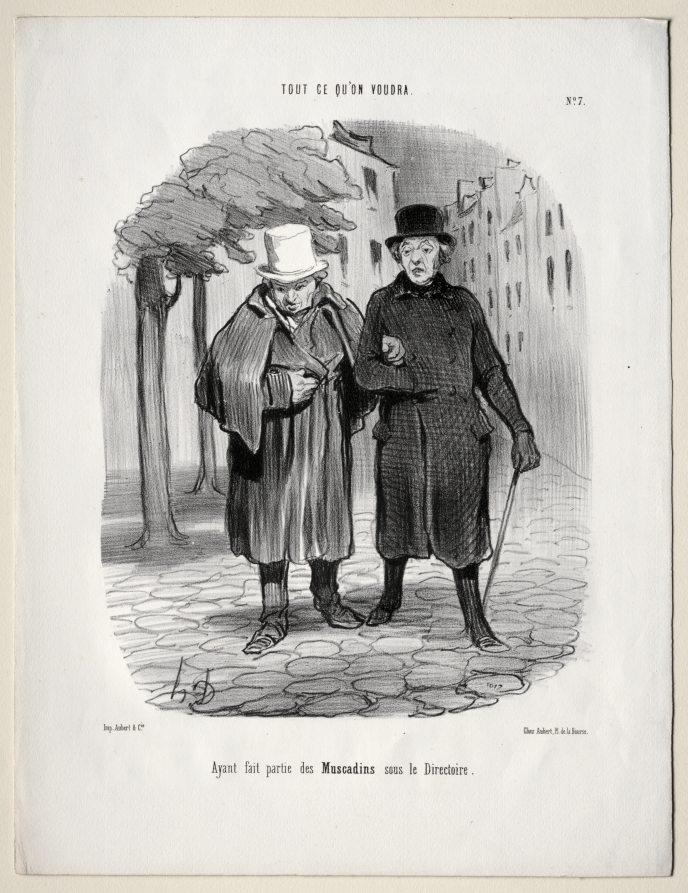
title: Former dandies under the Directory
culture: France, 19th century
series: As You Like It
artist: Honoré Daumier (French, 1808–1879)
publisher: Aubert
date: 1847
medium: lithograph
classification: Print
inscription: Above image, printed: TOUT CE QU'ON VOUDRA. / No. 7 ; Below image, printed: Ayant fait partie des Muscadins sous le Directoire.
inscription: Lower margin, printed: Imp. Aubert & Cie. / Chez Aubert, Pl. de la Bourse.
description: This print was published in Le Charivari (June 13, 1847) as plate 7 from the series As You Like It.